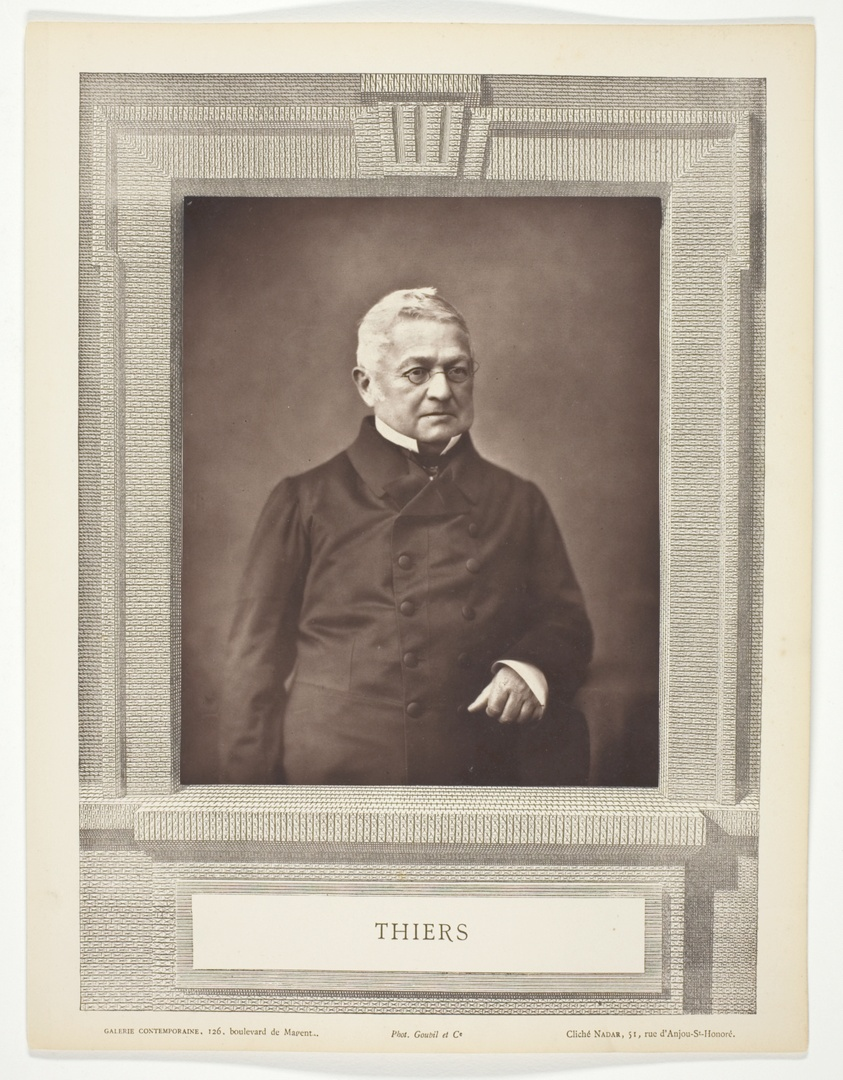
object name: Photograph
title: Thiers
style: 19th century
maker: Nadar (Gaspard Félix Tournachon) (French, 1820–1910)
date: c. 1870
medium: Woodburytype, from the periodical “Galerie Contemporaine Littéraire, Artistique” (1876), volume 1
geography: France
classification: woodburytype; photomechanical process; photography; photograph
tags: Collected by Hugh Edwards, Contemporaine Littéraire